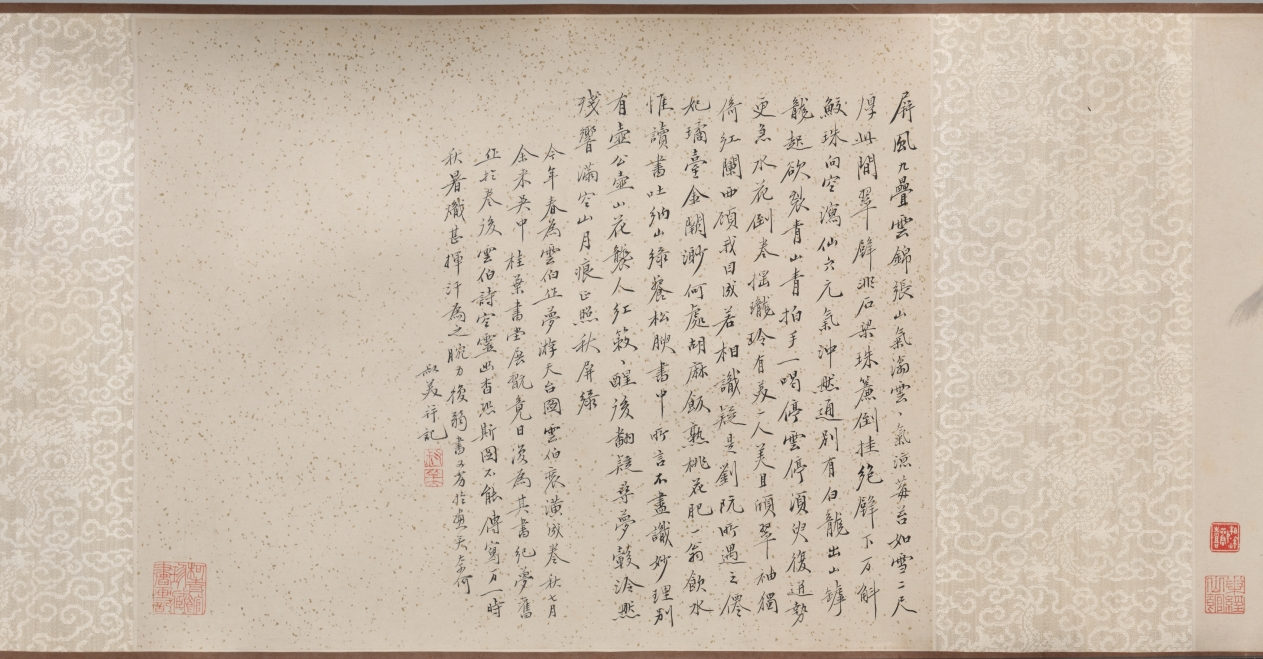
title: Dream Journey to Mt. Tiantai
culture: China, Qing dynasty (1644-1911), Jiaqing reign (1796-1820)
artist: Qian Du (Chinese, 1763–1844)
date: 1814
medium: handscroll; ink on paper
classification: Painting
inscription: 夢游天台圖. 余舊藏子畏赤城仙館卷子，僅尺餘而具千巖萬壑之勢。甲戌三月，戲為雲伯臨作行看子。錢叔美并識。[印]壺公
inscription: 今年春為雲伯作夢游天台圖，雲伯裝淇成卷。秋七月，余來吳中桂葉書堂，展玩竟日後，為其書紀舊作於卷後。雲伯詩空靈出杳，恐斯圖不能傳寫萬一。時秋暑熾甚，揮汗為之，腕力復弱，書又劣於畫，夫奈何。叔美并記。[印]叔美 [印, 右下]錢叔美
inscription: 屏風九疊雲錦張，山氣滃雲雲氣涼。/ 莓苔如席二尺厚，此間翠壁非石梁。/ 珠簾倒挂絕壁下，萬斛鮫珠向空瀉。/ 仙穴元氣沖然通，別有白龍出山罅。/ 龍起欲裂青山青，拍手一喝停雲停。/ 須臾復迸勢更急，水花倒捲搖瓏玲。/ 有美一人美且頎，翠袖獨倚紅闌西。/ 顧我目成若相識，疑是劉阮所遇之仙妃。/ 瓊臺金闕渺何處，胡麻飯熟桃花肥。/ 一翁飲水惟讀書，吐納山綠餐松腴。/ 書中所言不盡識，妙理必有壺公壺。/ 山花襲人紅蔌蔌，醒後翻疑尋夢轂。/ 泠然殘響滿空山，月痕正照秋屏綠。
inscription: 3 additional seals unidentified.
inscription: Titleslip by Mo Beiming 莫北溟 (active early 20th century)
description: When he painted Mt. Tiantai 天台山, Qian Du was a mature artist with a distinctive style that balanced refinement and “studied awkwardness.” He included the site’s famed features: the crescent-shaped stone bridge arching across the waterfall and surrounded by dense cliffs. Rows of pine and other vegetation appear in the crevices above and below the mountain. The twisting trunks and branches are left in outline, encased within the variegated foliage. In a pavilion at the center, a man and a woman look back to the lower right, across the ravine and toward the cascading water. Beyond and to the left, two simple mounds are backed by hills that stretch into the distance. Qian Du left space above the hills for an inscription describing the circumstances that gave rise to the painting. Chen Wenshu, family friend and patron to Qian Du, had dreamt of a journey to Tiantai, a mountain famed for both its natural beauty and its associations with legends and myths. This short handscroll was based on Chen’s description of his dream journey, on which he marveled at the scenery and encountered a goddess. Six months after the painting’s completion, Qian transcribed his friend’s longer poetic reminiscence on paper mounted after the painting. The landscape of the painting was not based on the physical site, which likely neither man had visited in 1814, but rather on the mythic tradition of Tiantai. It caused turbulence in the mind of the poet and provided inspiration to the painter.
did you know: The man and woman in the pavilion likely represent Chen Wenshu and the mysterious presence he encountered on his dream journey to Mt. Tiantai.